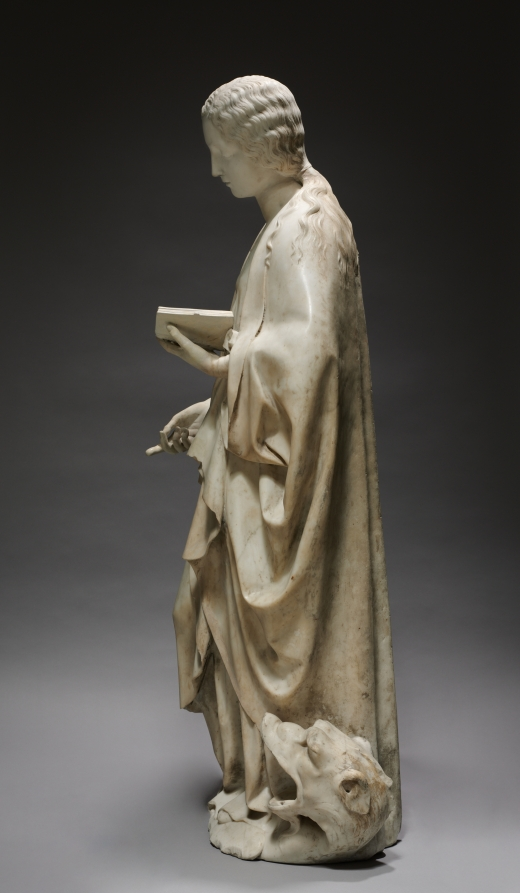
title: Saint Margaret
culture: Italy, Sicily, Palermo, 16th century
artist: Antonello Gaggini (Italian, 1478–1536)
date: c. 1520–1530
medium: marble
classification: Sculpture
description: Gaggini was a member of a large family of sculptors whose Palermo workshop supplied monumental religious sculptures for the cathedrals of Palermo and Messina in Sicily and Montelione in Calabria. After 1507 Antonello himself worked for 15 years to produce marble sculptures for Palermo Cathedral. This figure of the legendary virgin martyr, Saint Margaret, was probably commissioned for one of these ecclesiastical foundations, possibly the chancel of Palermo Cathedral. The saint is shown reading from a book of hours (a sign of her piety) and trampling upon a dragon, the symbol of Satan. The dragon became the attribute by which she is recognized in sacred art.